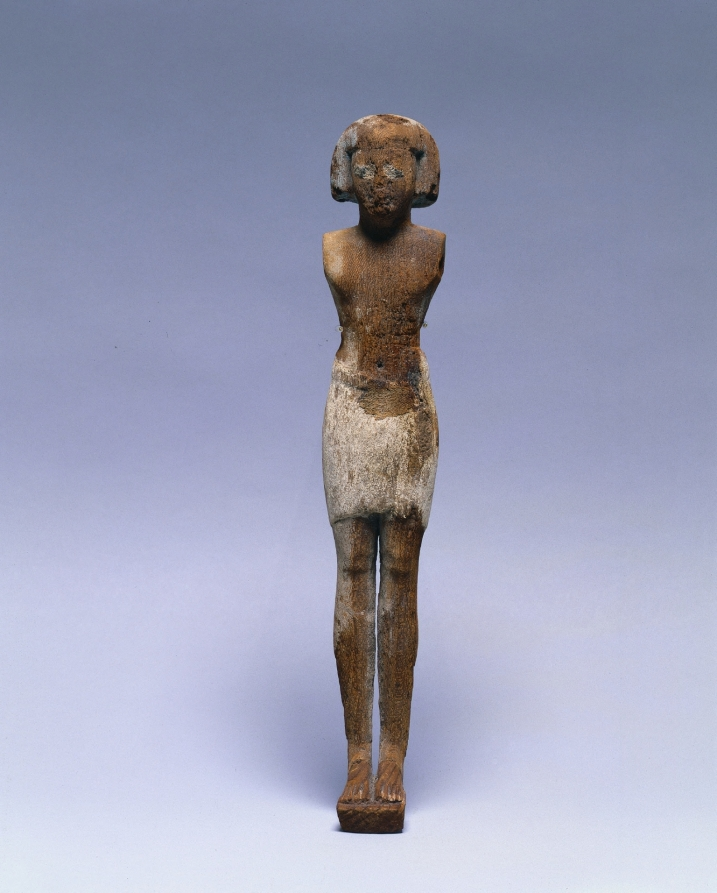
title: Statuette of a Man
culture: Egypt, probably Meir, Middle Kingdom (2040–1648 BCE), Dynasty 12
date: 1980–1801 BCE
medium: painted and gessoed tamarisk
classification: Wood